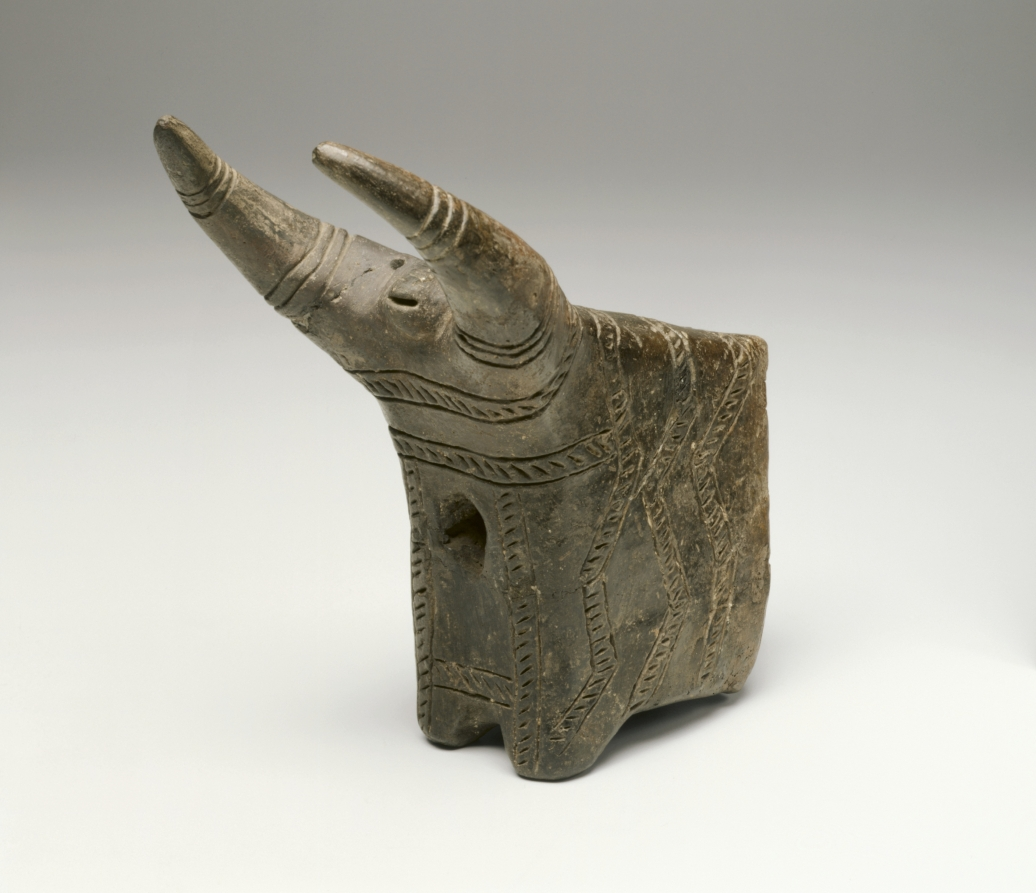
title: Bull Protome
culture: Cyprus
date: 2000–1000 BCE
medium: terracotta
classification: Ceramic